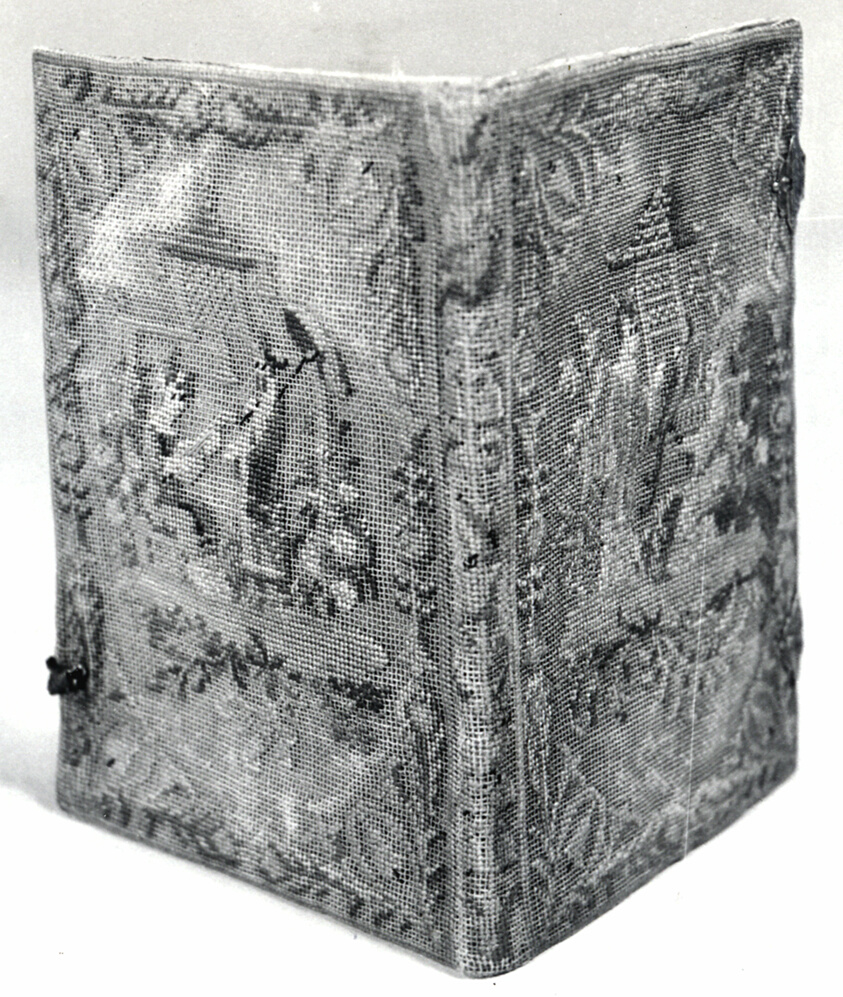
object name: Book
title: Letter Case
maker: English or French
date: 18th century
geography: England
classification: textile; needlework (visual works); book